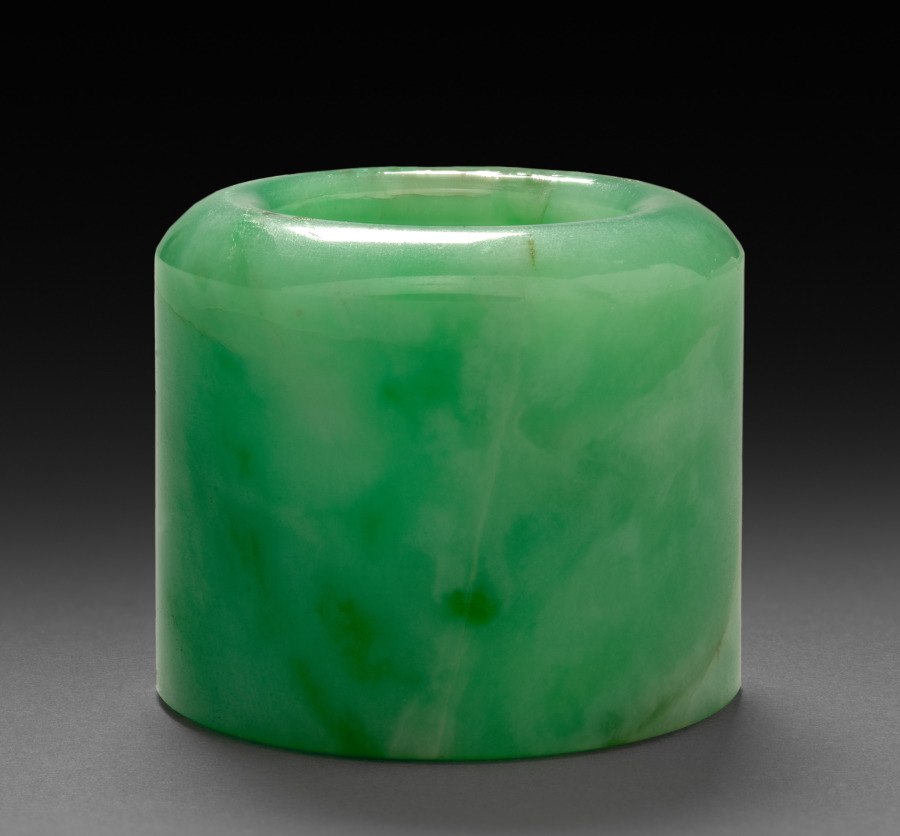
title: Thumb Ring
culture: China, Qing dynasty (1644-1911) or Republican period (1912-49)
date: 1800s–1900s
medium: green and white jade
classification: Jewelry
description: Jade rings were worn by men on the thumb of the right hand to assist with holding and pulling the string of the archer’s bow. However, thumb rings were also fashionable accessories for civil officials in the late Qing dynasty.